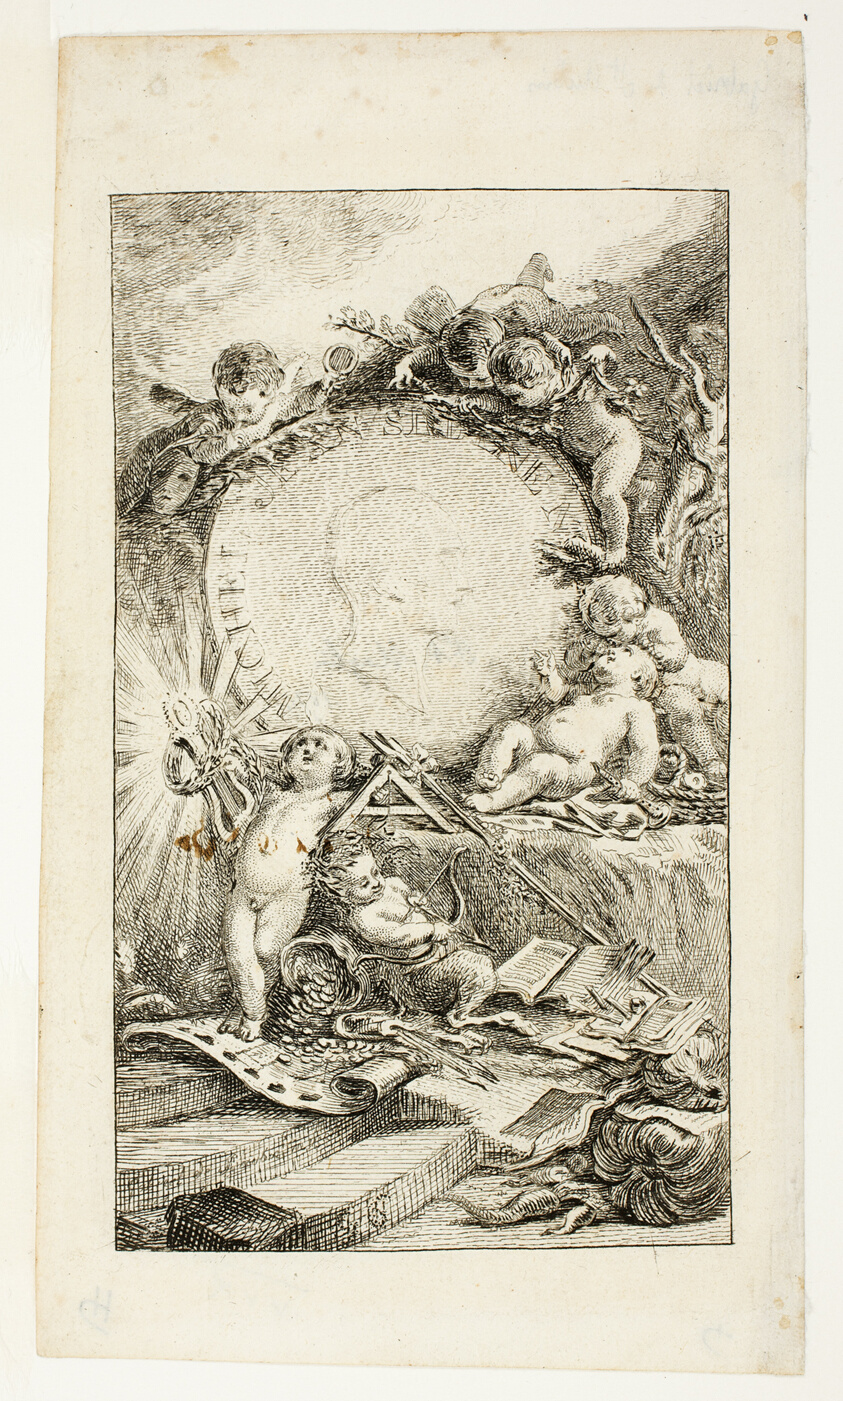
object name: Print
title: Frontispiece, plate one from Recueil de Poésies de Sedaine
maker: Gabriel Jacques de Saint-Aubin (French, 1724-1780)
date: 1757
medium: Etching on ivory laid paper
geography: France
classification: etching; print; prints and drawing